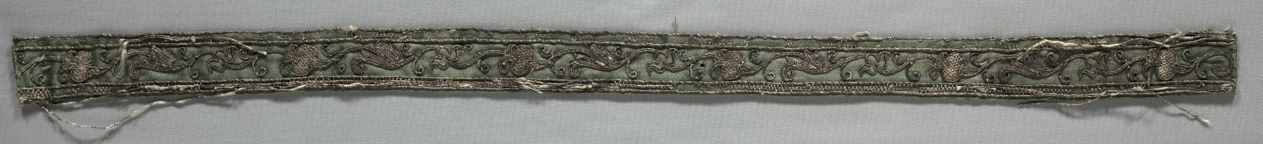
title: Apparel from a Dalmatic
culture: Italy, early 16th century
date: early 1500s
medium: embroidery; silk and metallic threads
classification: Embroidery